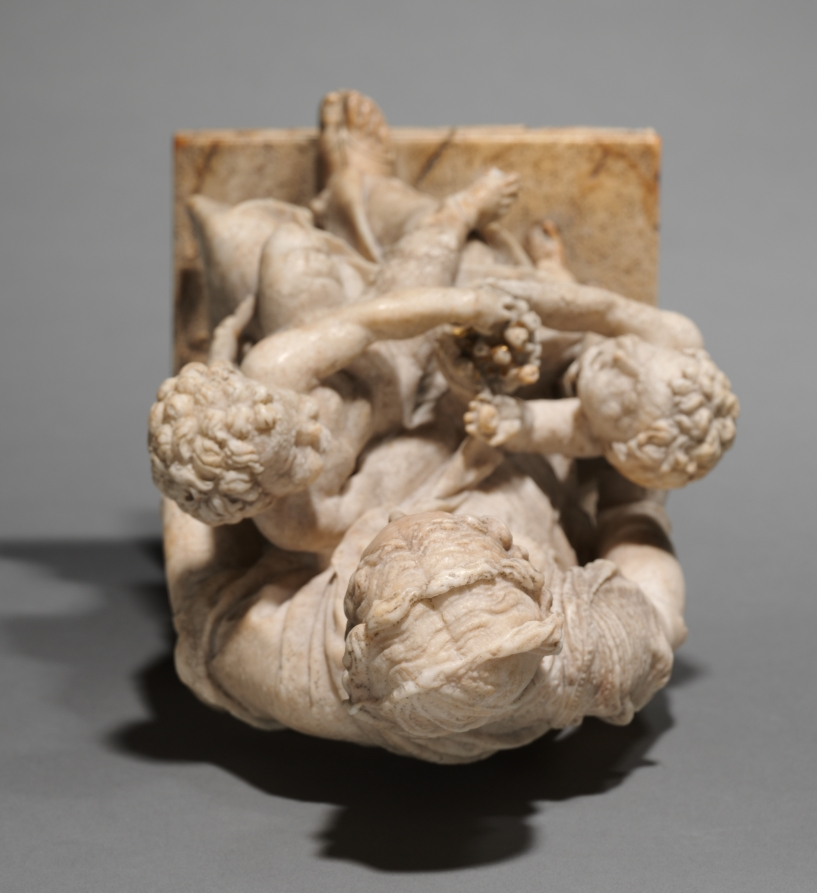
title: Charity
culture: Franco-Flemish, second half 16th century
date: c. 1550–1600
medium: alabaster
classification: Sculpture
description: When this alabaster group entered the museum's collection, it was thought to depict the Virgin Mary, Christ, and Saint John the Baptist. It has been identified, however, as a personification of Charity, the most elevated of the three Christian theological virtues. The two other theological virtues are Faith and Hope. Within Christian belief, Charity is also known as a supernatural virtue, where the object of human conduct is the ultimate unification with God through love. Alluding to its eminent position, Charity sits enthroned, with powerful hybrid beasts supporting her chair. The diminutive footstool propping up her left foot may refer to the necessity of humility in one's relationship to God. Also, a child raises a vessel filled with fruits to another suggesting that selflessness and love are attributes of charitable actions.